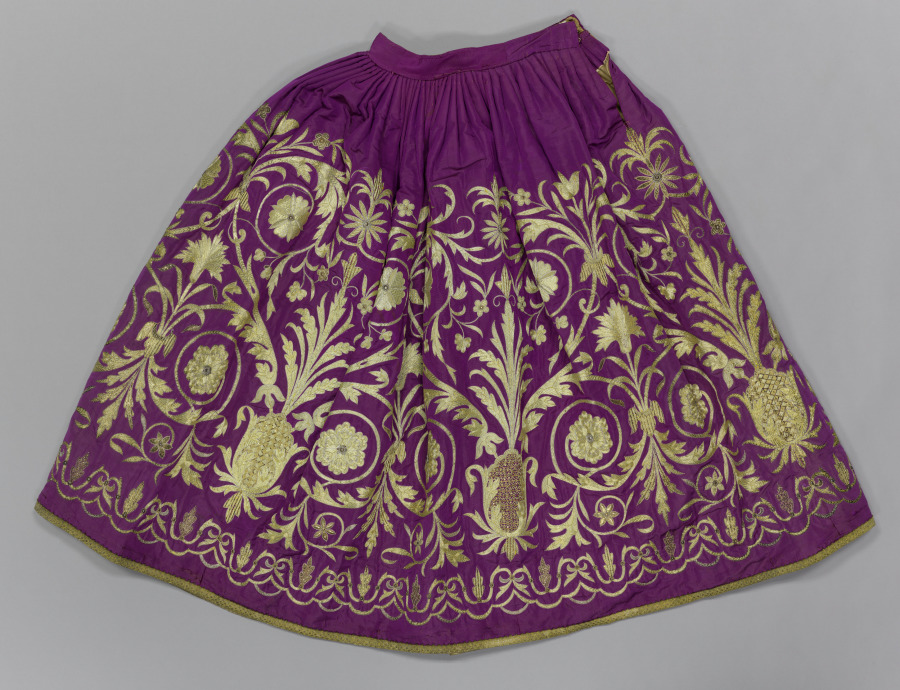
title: Woman's Costume (Skirt)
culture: Italy, Sicily, 19th century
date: 1800s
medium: plain weave silk (purple) with metal thread embroidery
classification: Garment